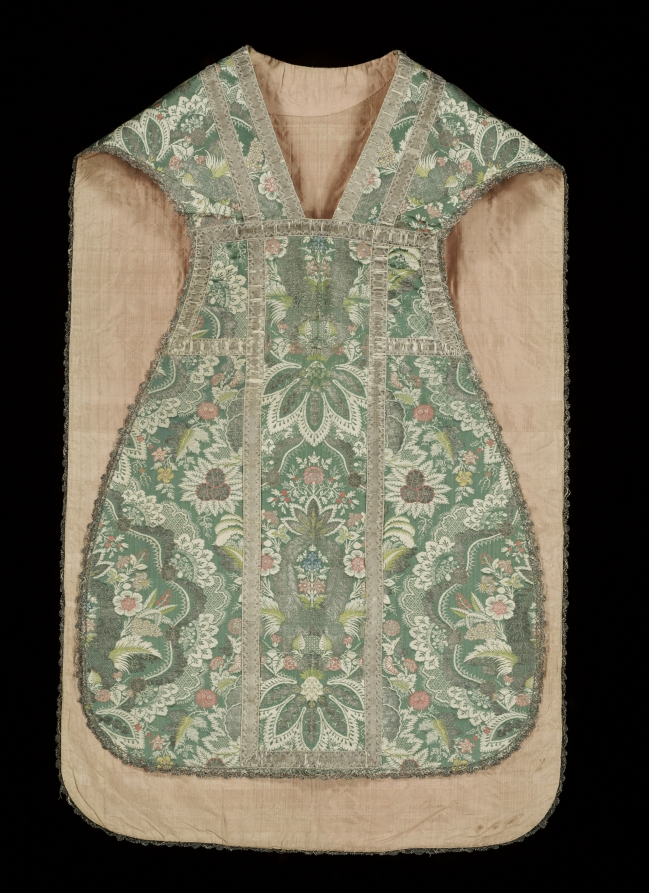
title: Chasuble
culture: France, Louis 14th style, 18th century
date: c. 1720s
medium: Silk; tabby weave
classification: Textile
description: The elegant formal design of blossoms and leaves in this woven silk is especially suitable for chasubles, liturgical vestments worn over albs with lace flounces and cuffs. Its small detailed ornament is reminiscent of prestigious lace, and is known as “lace pattern.” The division of the surface into three panels reflects the outmoded fashion of highlighting a different fabric in the center, often with religious images, called orphrey bands. In another change of ecclesiastical fashion, woven silks, such as this splendid example in the style of King Louis XIV (ruled 1638–1715) of France, were replaced during the early 1700s by embroidered decoration, which dominates in this exhibition.